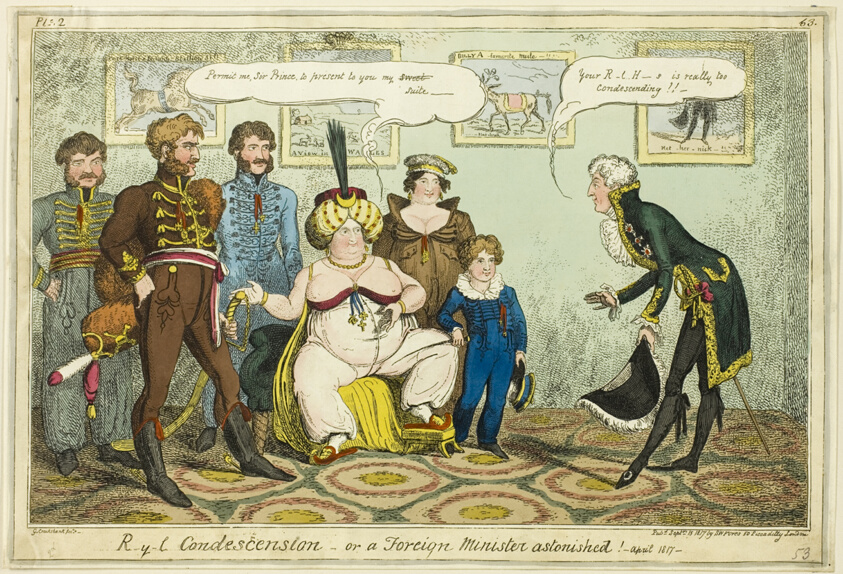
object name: Print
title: Royal Condescension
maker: George Cruikshank (English, 1792-1878); published by S.W. Fores (English, 1761-1838)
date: published September 15, 1817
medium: Hand-colored etching on paper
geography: England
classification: etching; print; prints and drawing